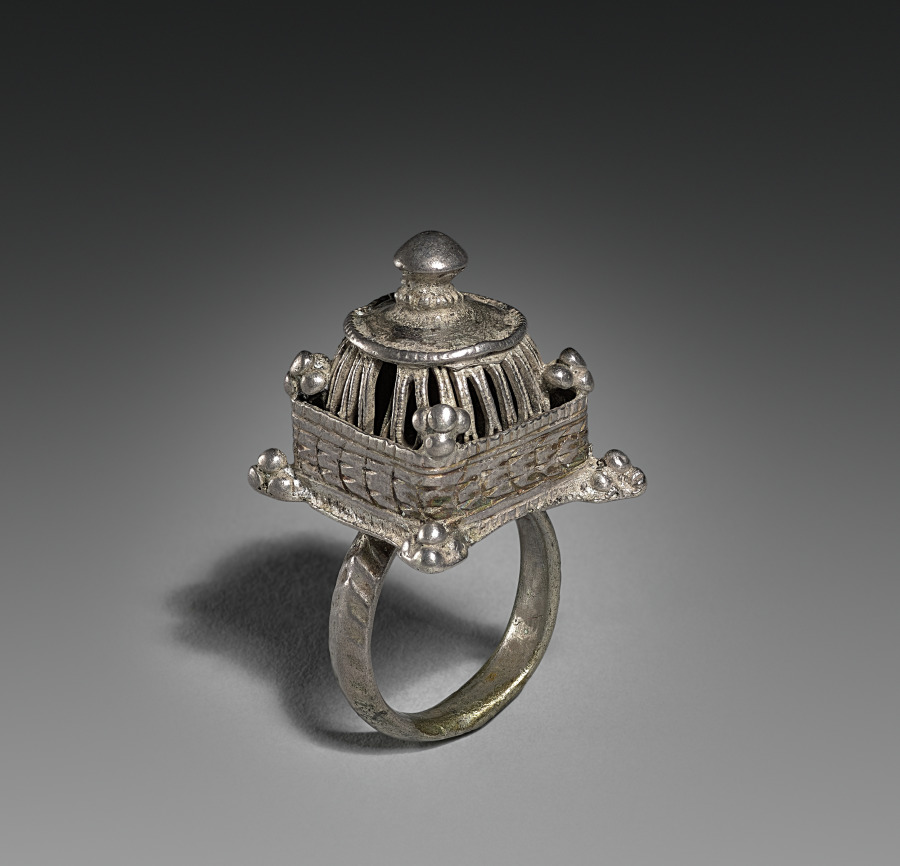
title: Ring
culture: Oman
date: early 1900s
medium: silver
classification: Jewelry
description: Silver finger-ringers were gifted or worn by both Omani men and women in a Zār ceremony to ward off evil.